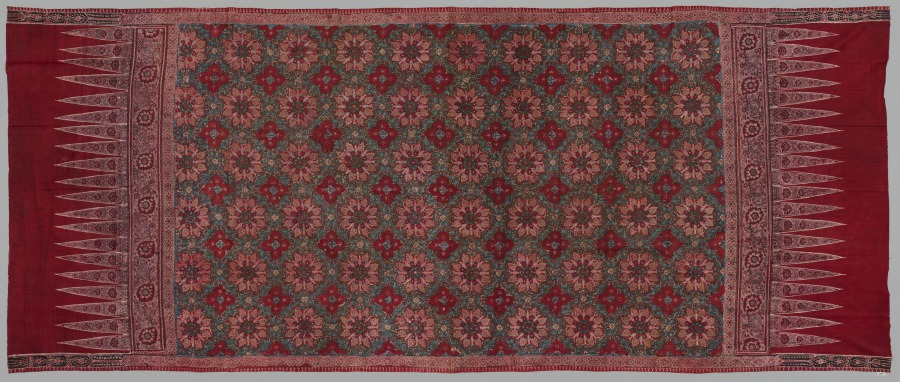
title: Hip Wrapper (tapis)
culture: India, Coromandel Coast, 1st half 19th Century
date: 1800–1850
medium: cotton; plain weave; block printed, drawn resist, painted mordants, dyed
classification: Textile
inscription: inked "Wanibu", Sumatra family name; "L" embroidered in plain weave